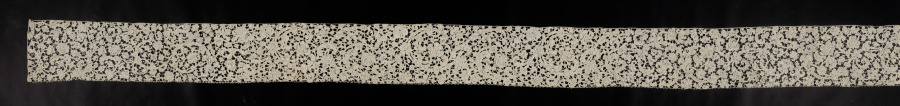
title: Lace Bed Valance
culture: Italy, Venice, 1660-1699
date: 1660–1699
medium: Needle lace (Venetian Raised Point)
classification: Lace